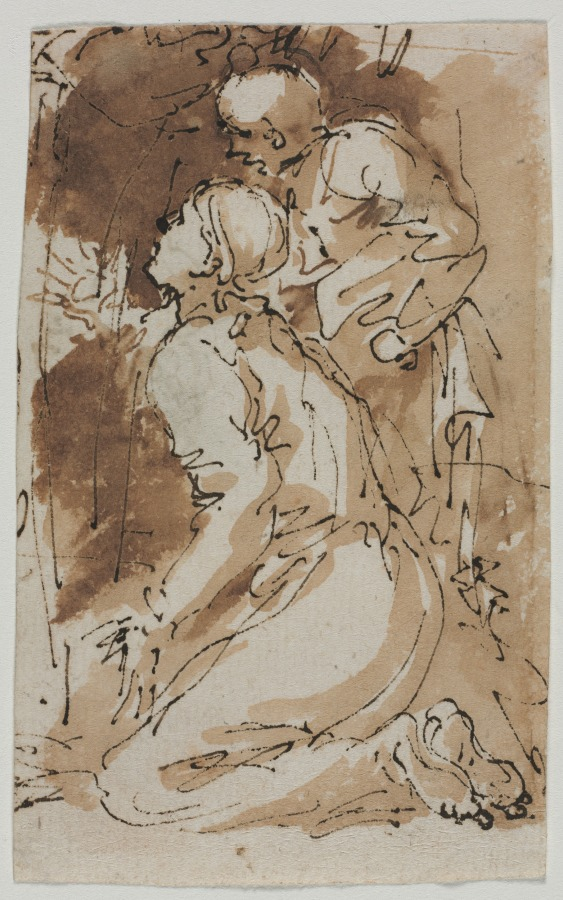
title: Figure Studies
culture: Italy, 17th century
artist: Salvator Rosa (Italian, 1615–1673)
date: c. 1640–1649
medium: pen and brown ink and wash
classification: Drawing